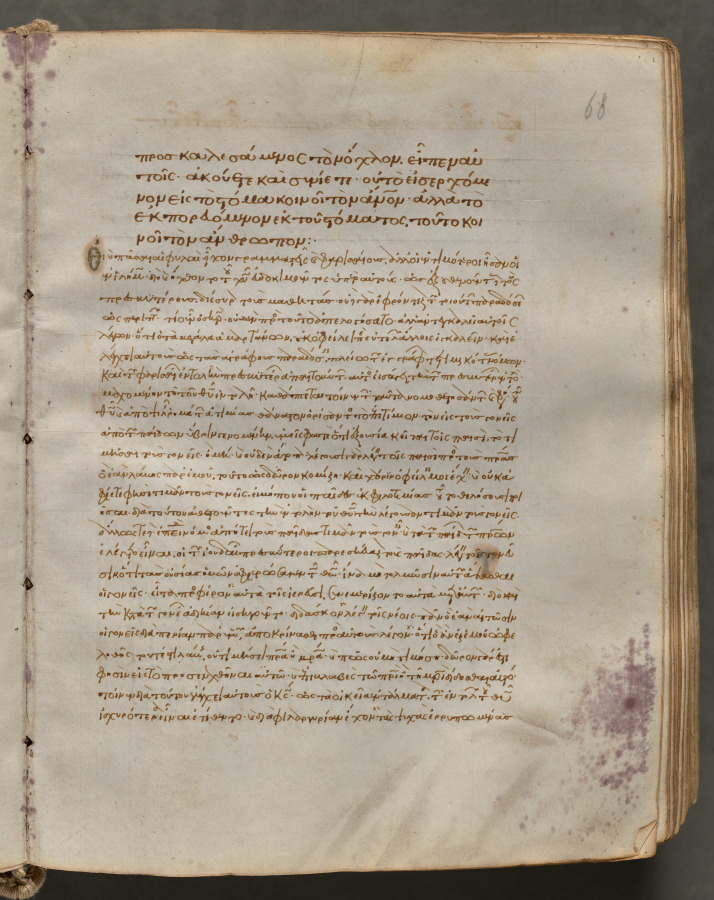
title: Text, folio 68 (recto), from a Gospel Book with Commentaries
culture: Byzantium, Constantinople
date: c. 1000–1100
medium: ink, tempera, and gold on vellum; leather binding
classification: Bound Volume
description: Each of the four gospels in this book opens on a page with brilliantly illuminated borders depicting the author of the text as well as birds-principally peacocks, symbols of the immortality of the soul-and fountains, representing the fountain of life and the salvation of the soul. This volume consists of 428 leaves with texts in Greek. Its level of sophistication suggests that it was probably written and decorated in a monastery in Constantinople.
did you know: Gospel Books were carried in procession through Byzantine churches.